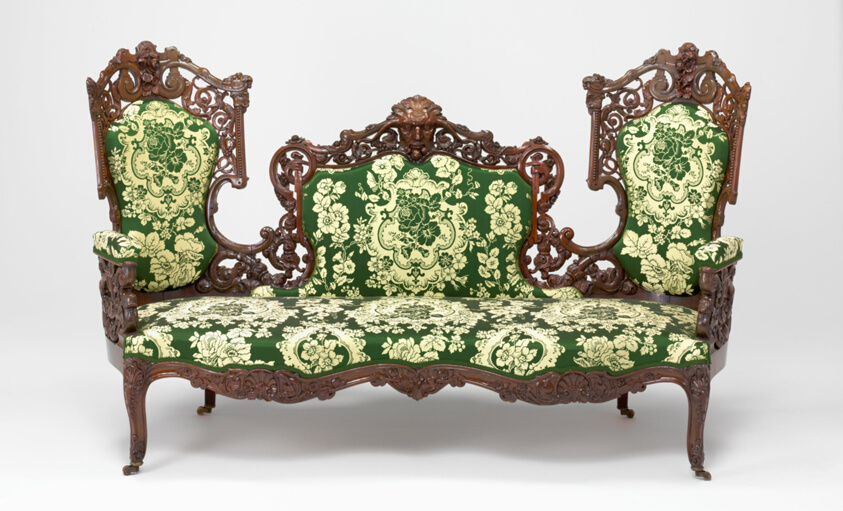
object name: Furniture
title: Sofa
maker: Attributed to Charles A. Baudouine; American, 1808–1895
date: 1849–54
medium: Mahogany, laminated mahogany, and upholstery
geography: New York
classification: seating; furniture; american decorative arts; american arts; textile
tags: furniture